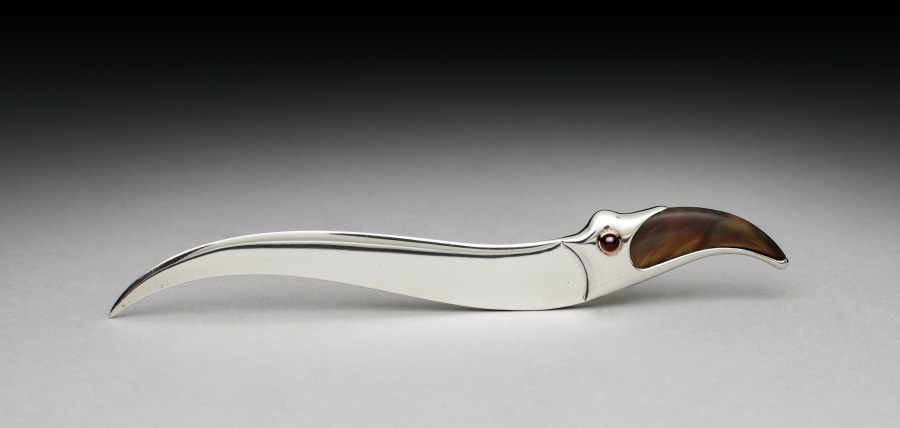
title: Letter Opener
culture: Russian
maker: House of Fabergé (Russian, 1842–1918)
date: c. 1899–1908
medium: Silver, bear claw, garnet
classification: Silver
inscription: “K. Fabergé” in Cyrillic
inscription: Cyrillic initials “AR”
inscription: kokoshnik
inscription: “88” silver standard